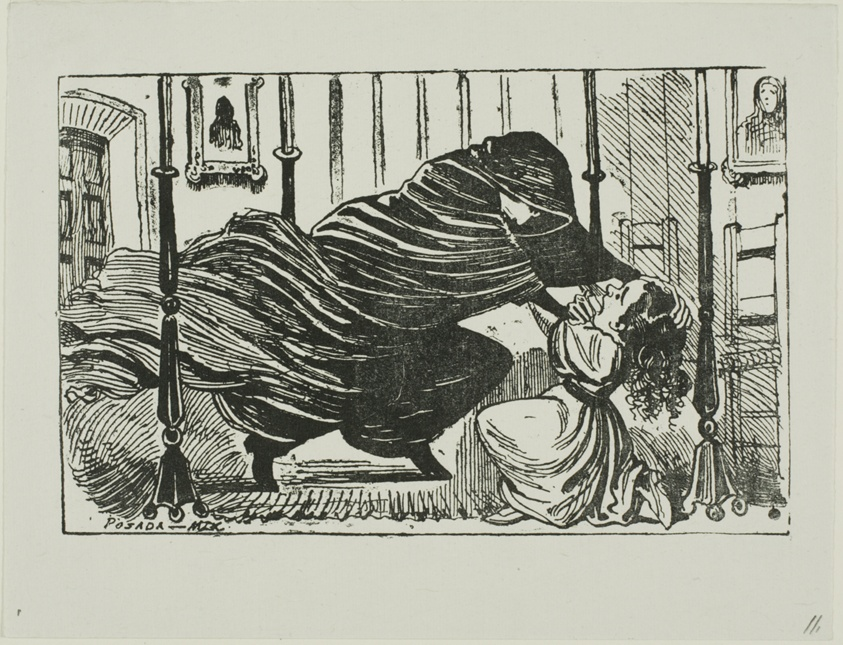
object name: Print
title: Illustration for a Story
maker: José Guadalupe Posada (Mexican, 1852-1913)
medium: Relief etching on zinc on paper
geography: Mexico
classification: relief etching; print; prints and drawing